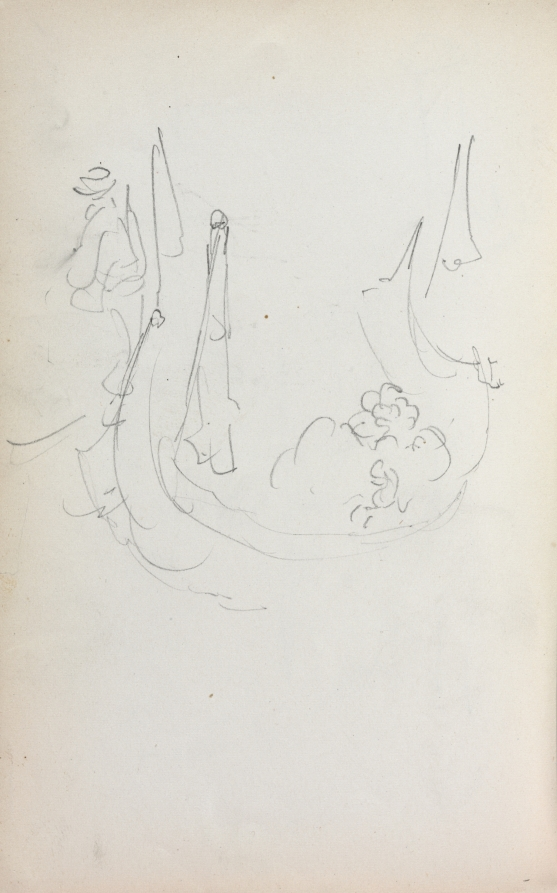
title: Italian Sketchbook: Gondola (page 35)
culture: America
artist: Maurice Prendergast (American, born Newfoundland [now Canada], 1858–1924)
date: 1898–1899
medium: pencil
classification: Bound Volume